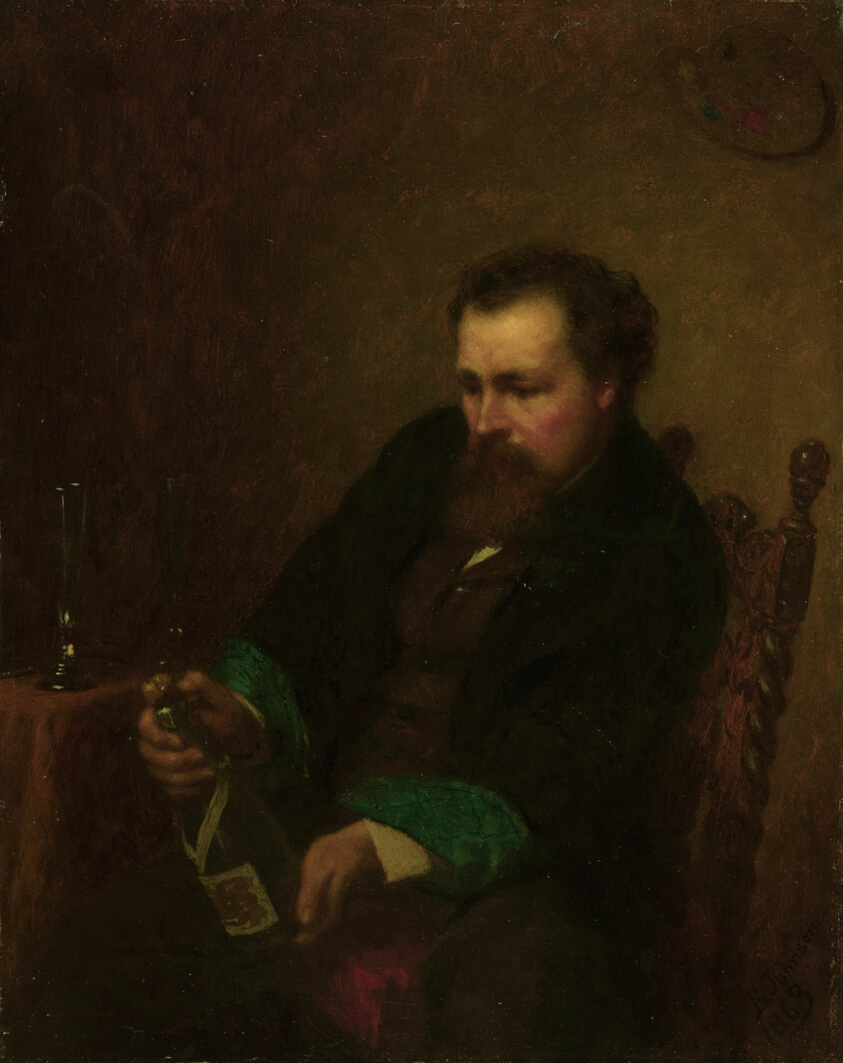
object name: Painting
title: Self-Portrait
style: Realism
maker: Eastman Johnson (American, 1824–1906)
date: 1863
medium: Oil on millboard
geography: United States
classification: painting; american arts